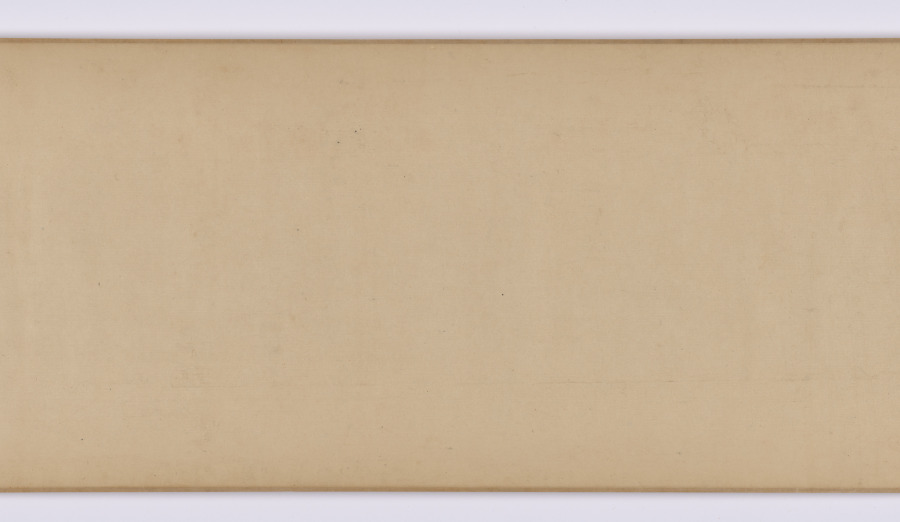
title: Poetic Feeling in a Thatched Pavilion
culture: China, Yuan dynasty (1271-1368)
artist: Wu Zhen (Chinese, 1280–1354)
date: 1347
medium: handscroll; ink on paper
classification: Painting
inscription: 依村構草亭，端方意匠宏。 林深禽鳥樂，塵遠竹松輕。 泉石俱延賞，琴書悅性情。 何當謝凡近，任適慰平生。 至正七年丁亥冬十月，為元澤戲作草亭詩意。梅沙彌書 [印]楳華盦; 嘉興吳鎮仲圭書畫記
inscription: 我愛梅花翁，巨老傳心印。 脩此水墨缘，種種得蒼潤。 樹石墮筆鋒，造化不能吝。 而今橡林下，我願執掃汛。 後學沈周 [印]启南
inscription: Colophon by Chen Rentao (1952): 予求梅道人畫二十年不可得。所見多膺鼎，即故宮所藏山水數軸都不可靠。傳世真迹，惟《漁父圖》、《嘉禾八景》與此《草亭詩意》而已。壬辰十月十四日余大病初愈，居家休養，研山師忽持此圖相贈。展卷披覽，頓覺精神沛振，如服僊藥。同日又得宋拓柳公權《神策軍紀聖德碑》，及群玉堂藏《真草書千(字)文》，皆海內孤本。一日得數寶，欣喜何如，書以志幸。 陳仁濤識 [印]陳氏仁濤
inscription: Colophon by Chen Rentao: 此圖作於至正七年丁亥，時年六十八，盖其晚年神品也。 濤又識 [印]陳仁濤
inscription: Title on frontispiece by Li Dongyang 李東陽 (1447-1516).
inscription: 33 additional seals: 1 seal of Li Chao-heng 李肇亨 (1592-1664)：檇李李肇亨書畫記; 9 seals of Liang Qingbiao 梁清標 (1620-1691): 蒼巖子、蕉林、蕉林梁氏書畫之印、蕉林秘玩、蕉林書屋、蕉林玉立氏圖書、棠邨 (appears twice)、棠邨審定; 1 seal of Wang Yirong (1845-1900): 懿榮; 3 seal of Li Yanshan (1898-1961): 雙銕笛樓 (appears twice)、硯山心賞; 12 seals of Chen Rentao 陳仁濤（1906-1968）：陳氏仁濤、陳仁濤珍藏印、金匱寶藏·陳氏仁濤 (appears three times)、金匱秘笈、金匱室、金匱室精鑒璽 (appears twice)、金匱室主、金匱神品、仁濤奇緣; 1 seal: 崐溟居士; 1 seal: 林止在㭯生圖書印; 3 seals unidentified.